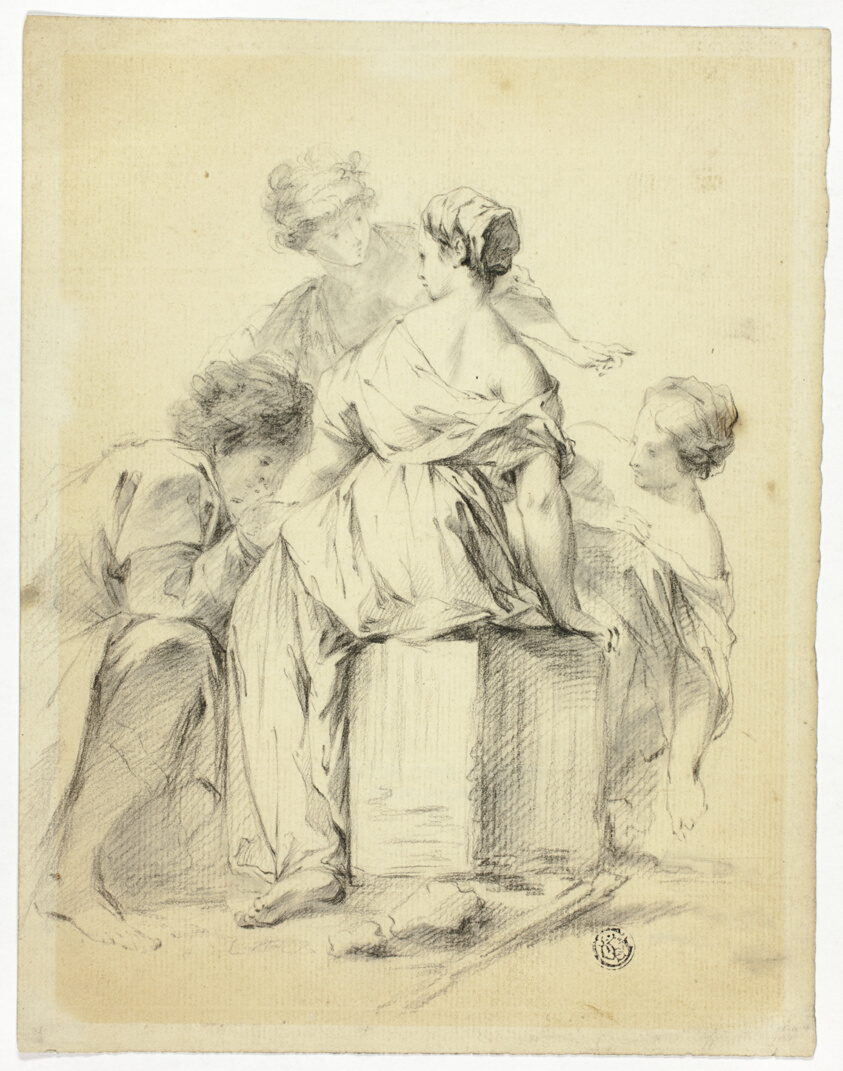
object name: Drawing and Watercolor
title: Courtship Scene with Youth and Three Maidens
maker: Unknown Artist; French or Italilan, 1700-1799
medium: Black chalk on cream laid paper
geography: France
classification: charcoal; drawings (visual works); prints and drawing